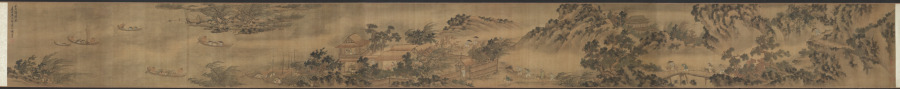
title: Returning to the Village in a Rainstorm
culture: China, Ming dynasty (1368–1644)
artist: Xie Shichen (Chinese, 1487–after 1567)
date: 1530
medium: Handscroll; ink and light color on silk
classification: Painting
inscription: 風雨歸村圖 嘉靖庚寅秋日樗仙謝時臣. [印] 謝時臣印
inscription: 3 additional seals unidentified.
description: This scroll depicts a wind- and rainswept landscape with figures in the countryside struggling against a late summer monsoon rainstorm. Such weather was familiar to residents of the lower Yangzi delta. Xie Shichen spent most of his life in the Suzhou area. Details of his career are scant, but his surviving works suggest that he made his living as a professional painter. This painting conveys drama and anecdotal observations, characteristic of Zhe school paintings, such as the one by Lü Wenying, CMA 1970.76.